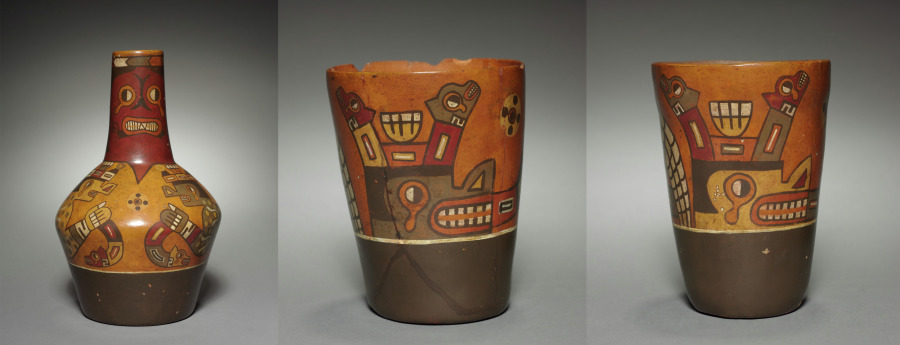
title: Wari-style Vessels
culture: Peru, modern, 20th century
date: before 1955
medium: pottery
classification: Forgery